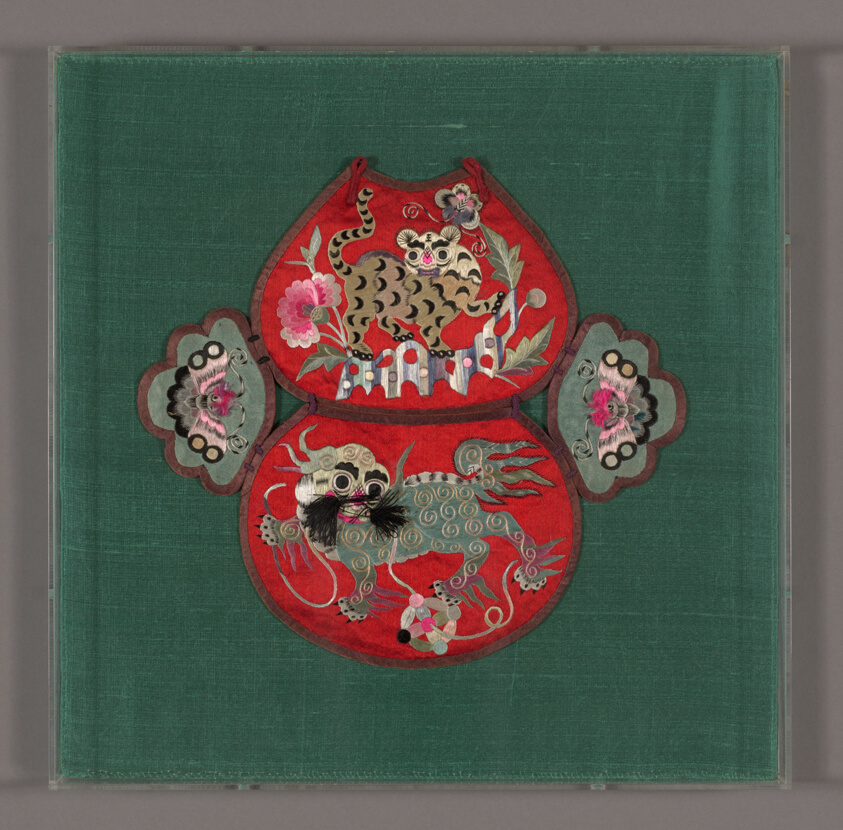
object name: Costume and Accessories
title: Child's Collar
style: qing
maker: China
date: Qing dynasty (1644– 1911), late 19th century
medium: Silk, satin weaves; embroidered with silk in satin, split, and stem stitches; laidwork and couching; edged with silk, satin weave; loops of silk, plain weave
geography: China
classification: textile; needlework (visual works); weaving; costume